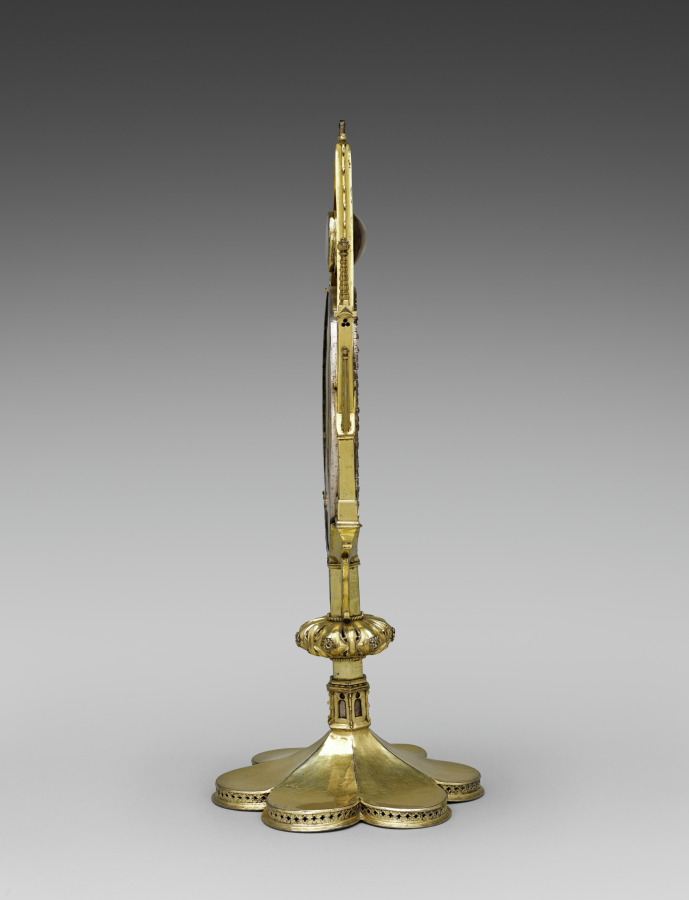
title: Monstrance with the "Paten of Saint Bernward"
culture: paten: Germany, Lower Saxony, Hildesheim; monstrance: Germany, Lower Saxony, Brunswick, Gothic period, paten: 12th century; monstrance: 14th century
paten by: Saint Oswald Reliquary Workshop (German)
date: c. 1180–1190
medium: silver, gilded silver, niello, rock crystal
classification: Metalwork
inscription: located in monstrance: two slivers of the True Cross surrounded by parchment with the inscription: DE SIGILLO DOMINI. Paten inscribed: +EST.CORPVS.IN.SE.PANIS.QVI.FRANGITVR.IN.ME:VIVET.IN ETERNVM. QVI.BENE.SVMIT.EVM. (outer rim); +HVC.SPECTATE. VIRI.SIC.VOS MORIENDO.REDEMI.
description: Designed to facilitate the display and veneration of ten relics, this sumptuous ostensorium (from the Latin ostendere, meaning "to show") is one of the most unusual reliquaries in the Guelph Treasure. Elements of contemporary Gothic architecture in miniature frame an elaborately decorated liturgical paten, the shallow disc or plate used for the elevation of the Eucharist during Mass. Fragments of the True Cross are enclosed behind a rock crystal in the gable, while other saintly relics, each wrapped in silk and identified by inscriptions, are visible only from the back. The paten is inscribed on its outer rim with the words "The bread which is broken in me is the body itself. He who receives it in good faith shall live in eternity." Another inscription surrounding the image of the enthroned Christ at the paten's center, reads, "Behold, o men, I have thus redeemed you with my death." Symbols of the four Evangelists and personifications of the four cardinal virtues complete the paten's iconographic program.